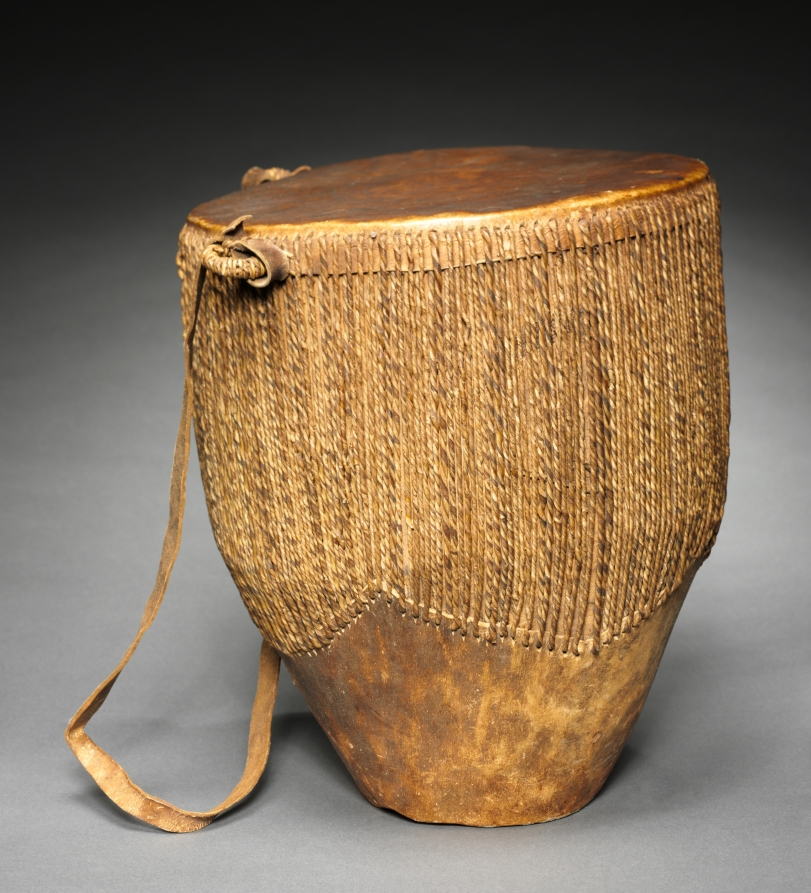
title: Drum (ngoma)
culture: Africa, Eastern Africa, unknown maker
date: by 1928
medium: Wood, rawhide, and plant fiber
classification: Musical Instrument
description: This musical instrument takes its name ngoma from the Kongo language word for "drum." Specialized craftspeople often made these drums. The wooden base is hollow and covered with a first hide, then a second one held tight by plant fibers. This allows the sound to resonate when just the first membrane is struck. In Uganda, drums contain a ritual "heart" known only to its maker, which helps to imbue it with power. In contrast with royal drums (mpango), this instrument is not considered sacred. The sounds from men striking drums could be used as a kind of communication or as music in a performance setting.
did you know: Paul Travis purchased this piece in Kampala, Uganda, shortly after receiving a telegram informing him that the African Art Sponsors and the Gilpin Players had commissioned him to collect African works with money they raised.